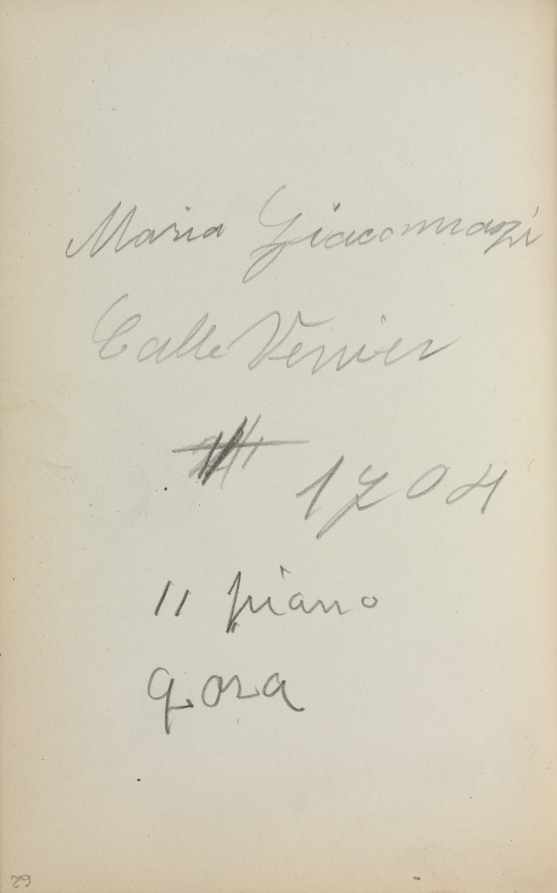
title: Italian Sketchbook: Notes (page 62)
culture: America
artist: Maurice Prendergast (American, born Newfoundland [now Canada], 1858–1924)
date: 1898–1899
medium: pencil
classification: Bound Volume